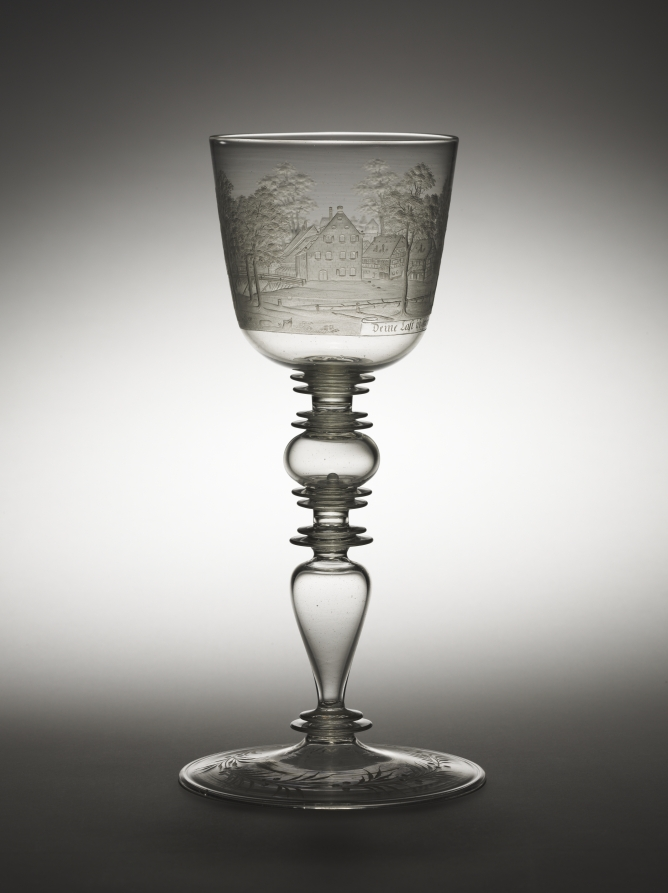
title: Goblet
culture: Bohemia, 17th century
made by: Hermann Schwinger (German, 1640–1683)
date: c. 1680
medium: glass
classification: Glass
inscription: signed and dated. Two inscriptions, one appears on the log held by two men: Es Ruhet auf beiden (It rests on both); the other appears below the scene: Deine Last ist meine Last. Ruhert du so habe ich Rast (Your burden is my burden. It you rest then so have I rest).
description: View of the Panierplatz in Nuremberg, and Allegory.